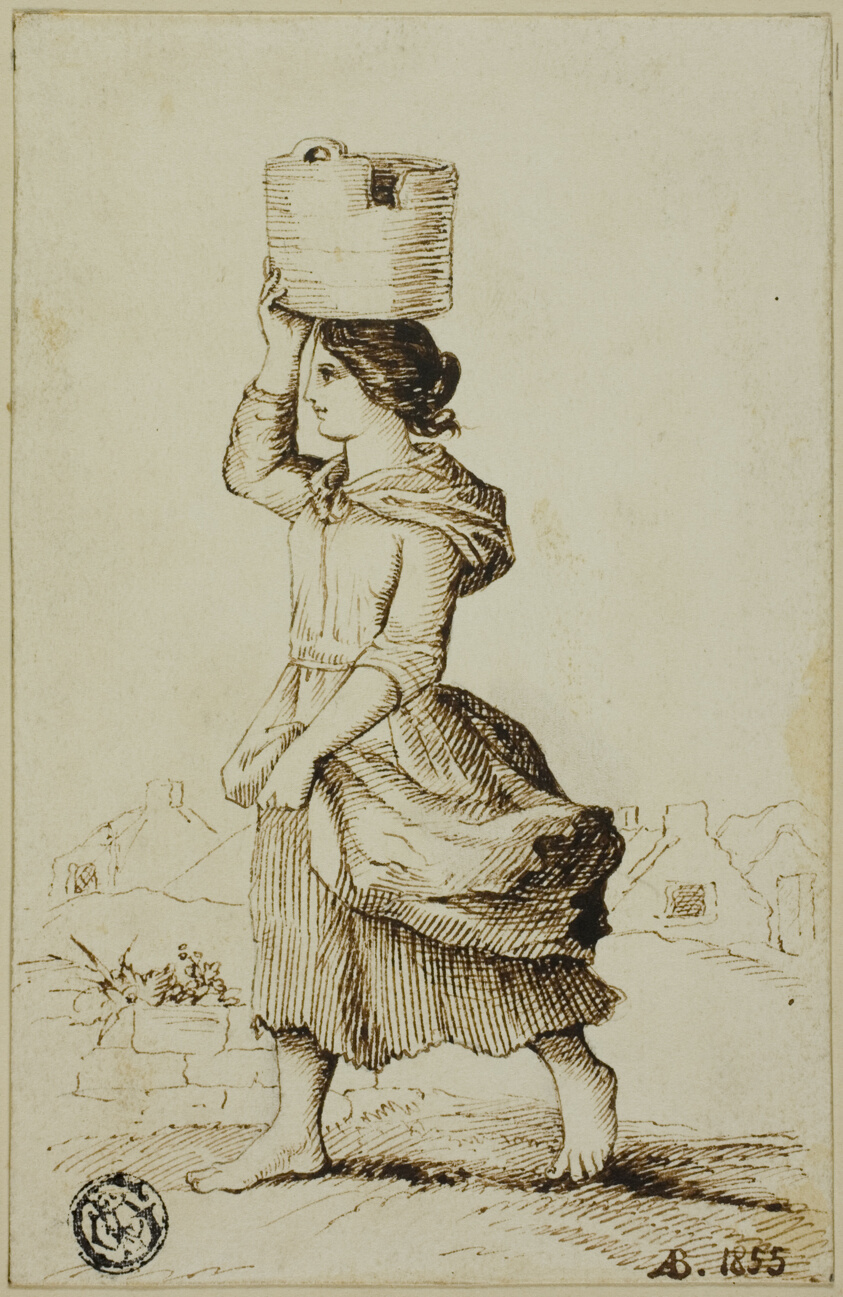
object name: Drawing and Watercolor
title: Girl of Claddagh or Fishing Suburb, Galway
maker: A. Bradstreet (British, active1855)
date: 1855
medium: Pen and brown ink, on ivory wove paper, laid down on cream wove paper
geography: United Kingdom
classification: pen and ink drawings; drawings (visual works); prints and drawing